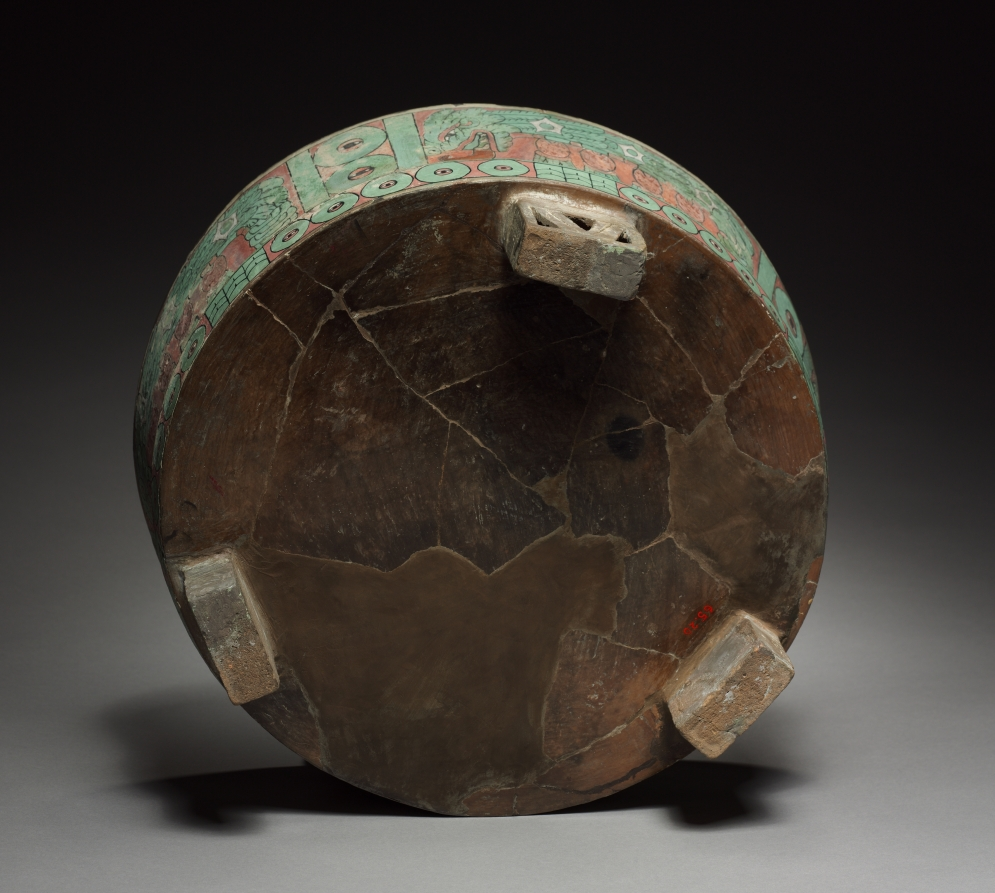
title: Basin with Feathered Serpent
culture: Central Mexico, Teotihuacán style, Classic period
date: 400–550 CE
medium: earthenware, stucco, pigment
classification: Ceramic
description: The serpent covered with the green feathers of the tropical quetzal bird is an image of verdant, bountiful nature and life. It also may be a symbol of rulership, thus linking rulers to cosmic forces and the natural order. Four human hearts lie beneath the serpent on this unusually large basin, suggesting that sacrifice stimulates nature’s fruitfulness.